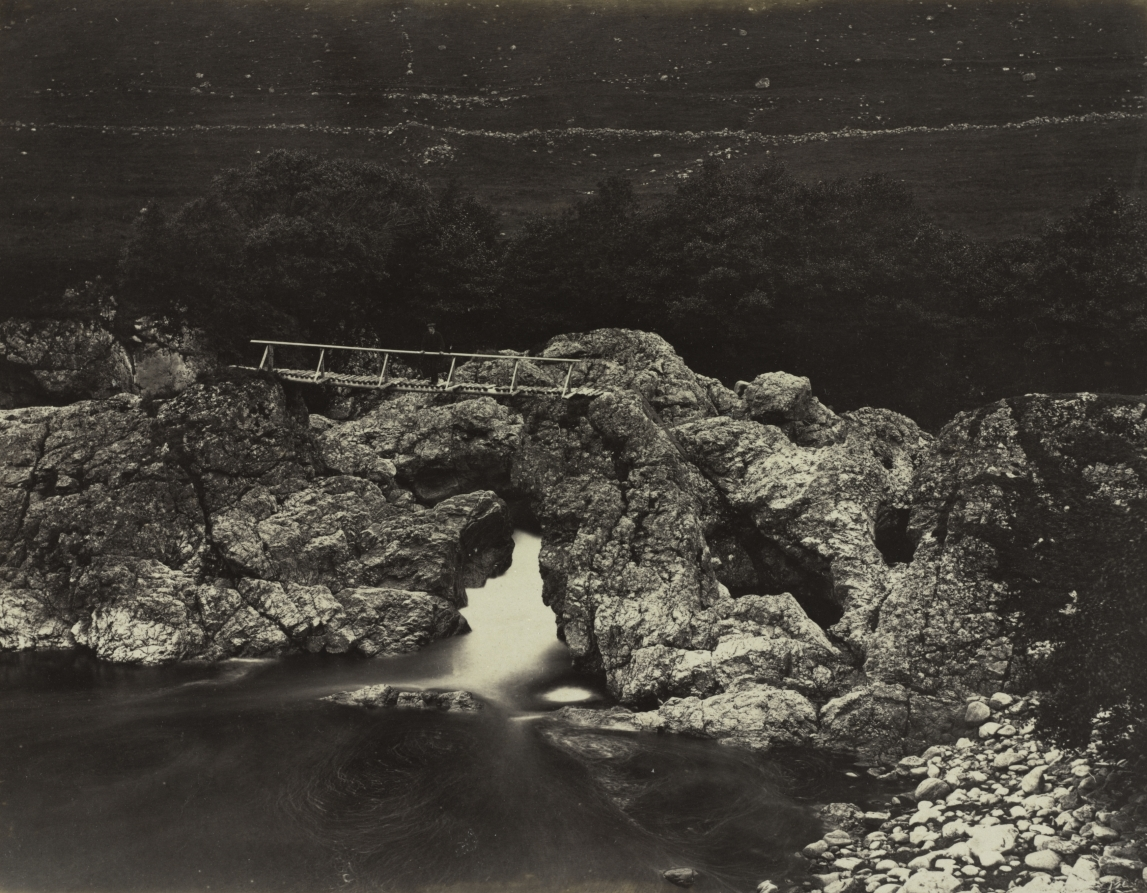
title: Shepherd's Bridge near Forest Lodge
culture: England, 19th century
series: Glen Tilt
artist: James Valentine (British, 1815–1880)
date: 1871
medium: albumen print from wet collodion negative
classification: Photograph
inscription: In graphite on recto of mount: "Shepherd's Bridge near Forest Lodge," "10 AC"